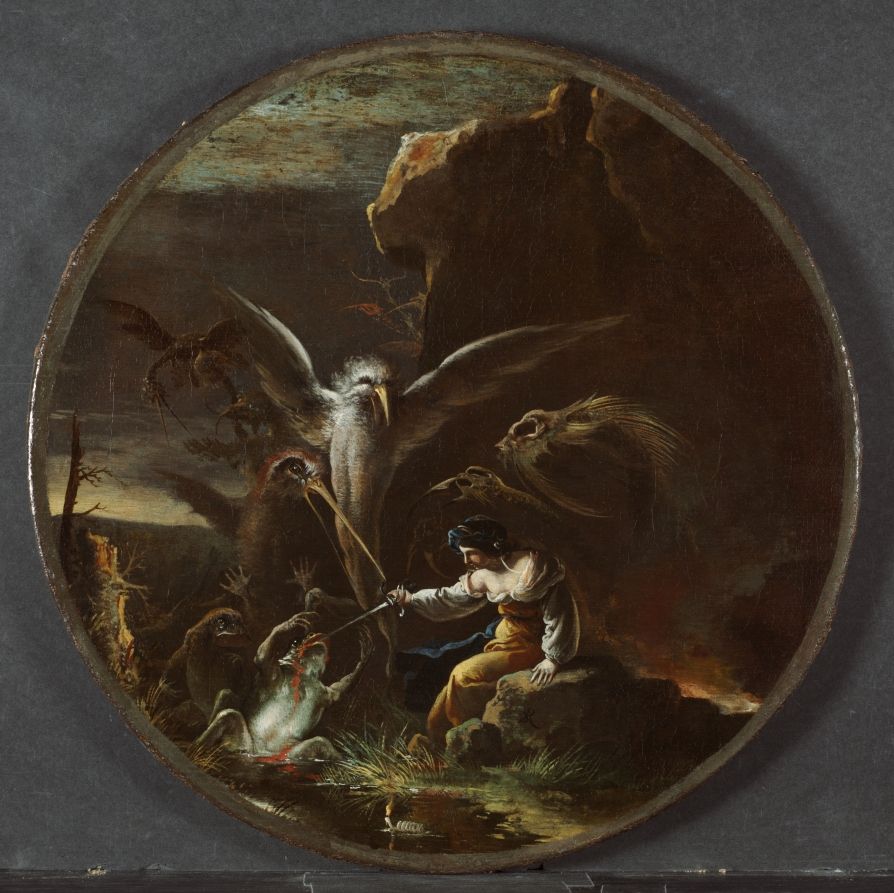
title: Scenes of Witchcraft: Morning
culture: Italy, 17th century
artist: Salvator Rosa (Italian, 1615–1673)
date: c. 1645–1649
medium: oil on canvas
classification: Painting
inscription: Signed: "SR [monogram]"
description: Rosa's first scene depicts a young witch who plunges her knife into a writhing amphibian at dawn. The dark clouds of daybreak and anthropomorphic crags provide a gloomy atmosphere, while malevolent birds with piercing beaks hover around the central stabbing, focusing the viewer's attention on the witch's vicious act. The only beautiful enchantress Rosa ever painted, her elegance and ability to transform men into animals evokes the goddess Circe. But Rosa wasn't interested in classical imagery; he inverted expectations by transforming Circe into an explicitly violent sorceress. Her calm expression makes the terrifying gesture of upraised human hands among the birds even more disturbing.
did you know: The artist chose the painting's shape to reference the foundational role of the circle in practicing magic.